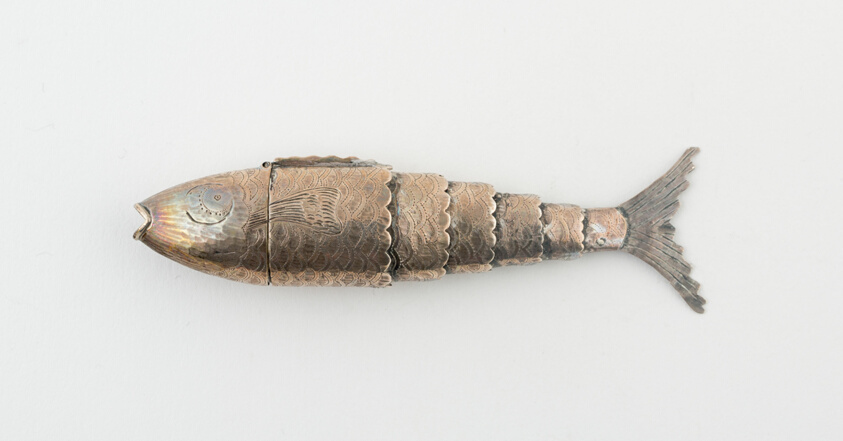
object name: Metalwork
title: Fish-Shaped Vinaigrette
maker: Joseph Willmore; Birmingham, England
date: 1817/18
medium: Silver and silver gilt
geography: Birmingham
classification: container for personal use; vinaigrette (container for health care); european decorative arts; metalwork; silver; decorative object/ornament